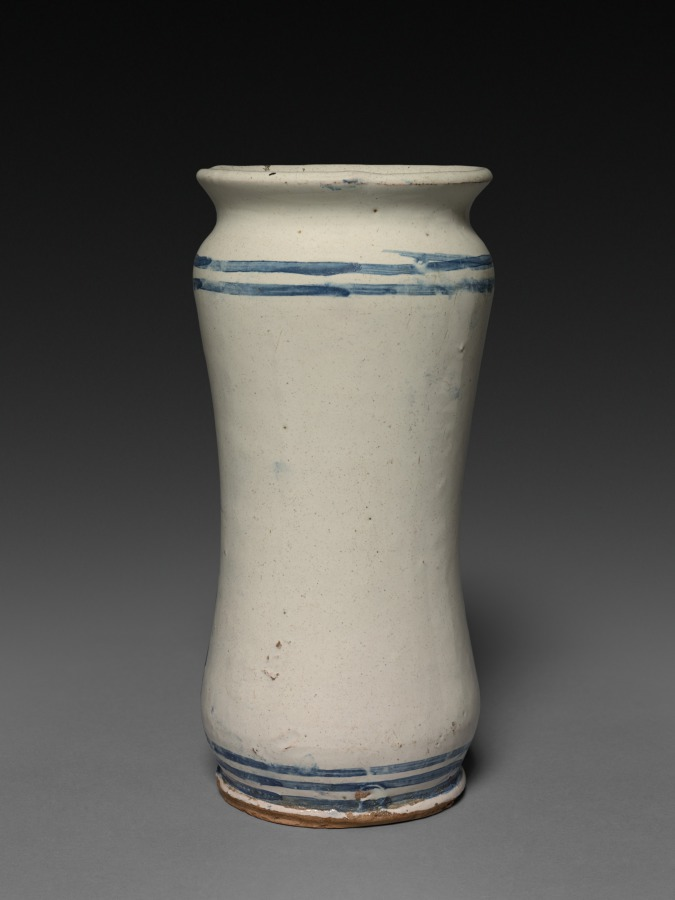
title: Pharmacy Jar (Albarello)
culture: Italy, Liguria, (Albissola ?), 17th century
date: 1650–1675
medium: faience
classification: Ceramic